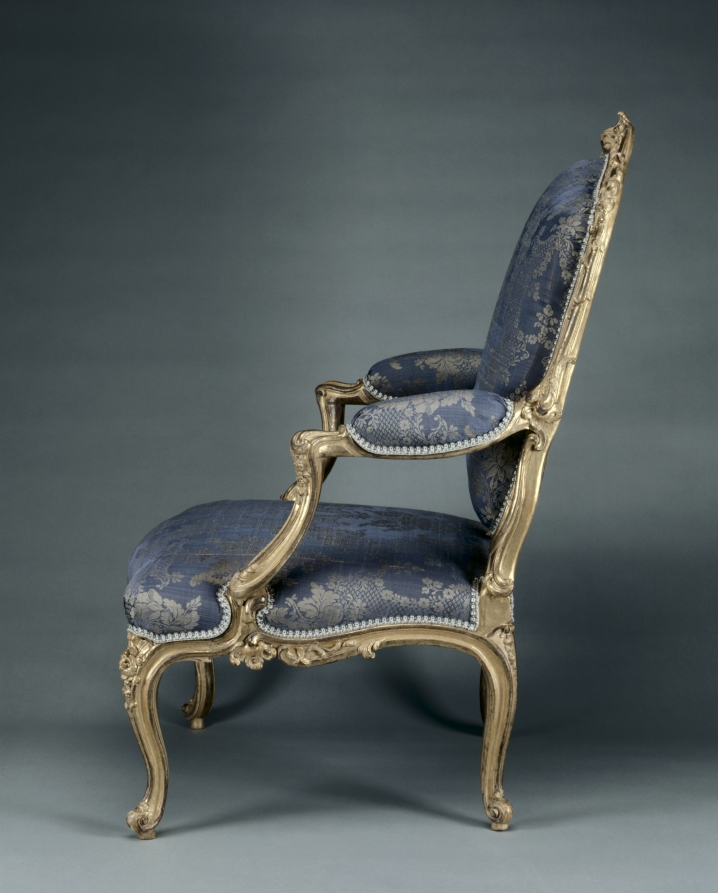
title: Armchair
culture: France, 18th century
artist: attributed to Nicolas Heurtaut (French, 1720–1771)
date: c. 1755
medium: carved and gilded wood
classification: Furniture and woodwork